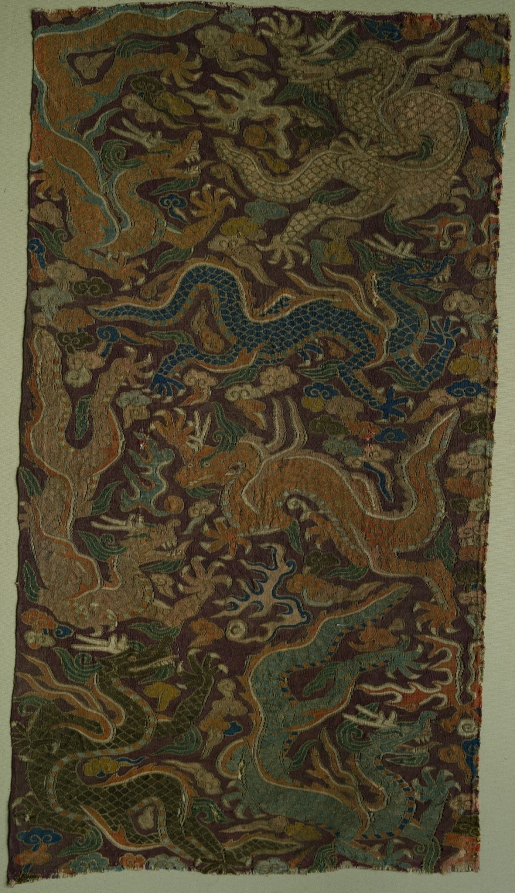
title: Dragons Chasing Flaming Pearls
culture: Central China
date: 1200s or earlier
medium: silk and gold thread: tapestry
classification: Textile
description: This rectangular, reversible tapestry (kesi) fragment, woven with silk and metal thread on a deep purple ground, is a section from yardage likely intended for a garment, but no contemporary paintings exist to confirm this. A selvage edge remains on the left; having an extant selvage edge provides us with information about the loom on which this textile was woven. The design motif of this kesi—dragons chasing flaming pearls—is Chinese. But the form of the dragons and the way they are crowded together is not Chinese. Rather than animals and birds among flowers, a frequently occurring pattern in the decorative art of eastern Central Asia that long predated the Mongol conquest, here the dragons are chasing flaming pearls. This deviation is indicative of the powerful influence of the Mongols.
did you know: The metal thread used in this weaving is fabricated from very thin strips of parchment with applied gold and silver leaf that are then wound around a core of yellow silk.